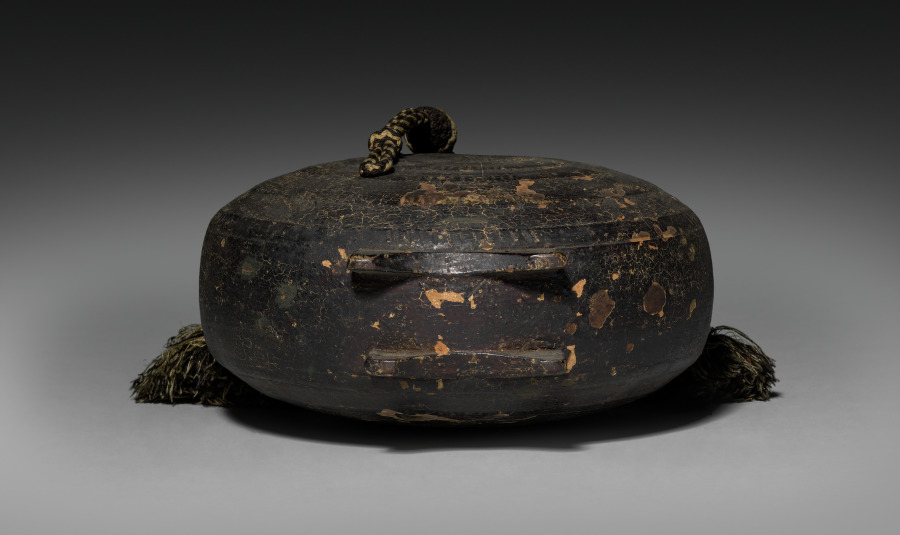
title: Powder Canister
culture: Italy, 18th century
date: 1700s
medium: wood painted black, lead charger, pewter mount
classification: Arms and Armor